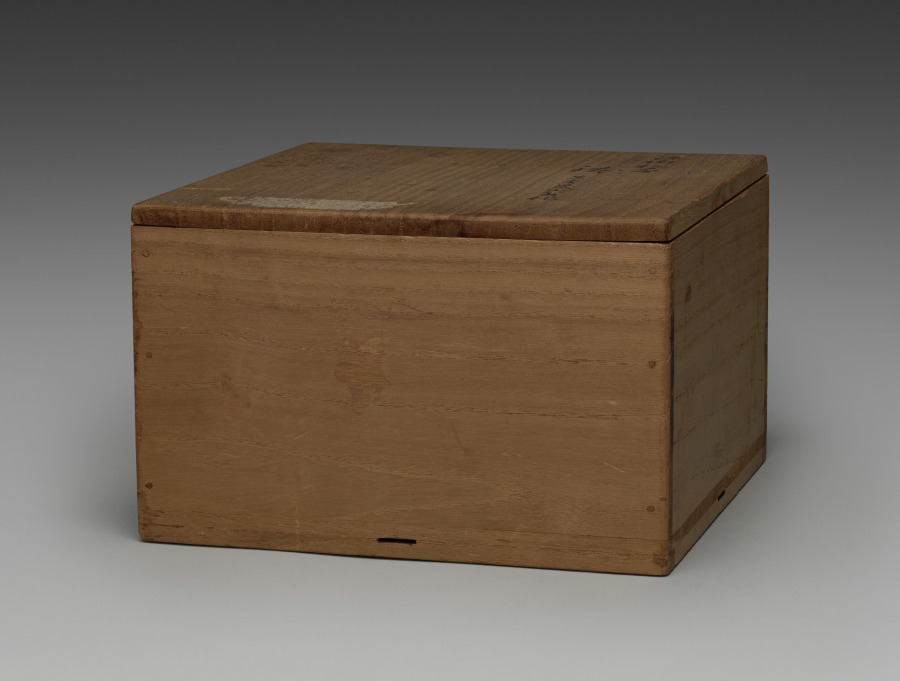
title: Bowl with Pines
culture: Japan, Meiji period (1868–1912)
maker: Seifū Yohei III (Japanese, 1851–1914)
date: 1893–1914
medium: porcelain with underglaze blue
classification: Ceramic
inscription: Inscription by Seifū Yohei IV on the box states that the bowl is the work of Yohei III.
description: The bowl has slightly more detailed surface designs painted in blue under the glaze than some other Yohei III's other teaware, like the Water Cooler with Pines, CMA 2022.163. The three pines, with two, three, and four racks of boughs respectively, have more angular rather than curved trunks, with clearly articulated bark.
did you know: The box for the bowl carries an attestation by Yohei IV that it is the work of his predecessor.